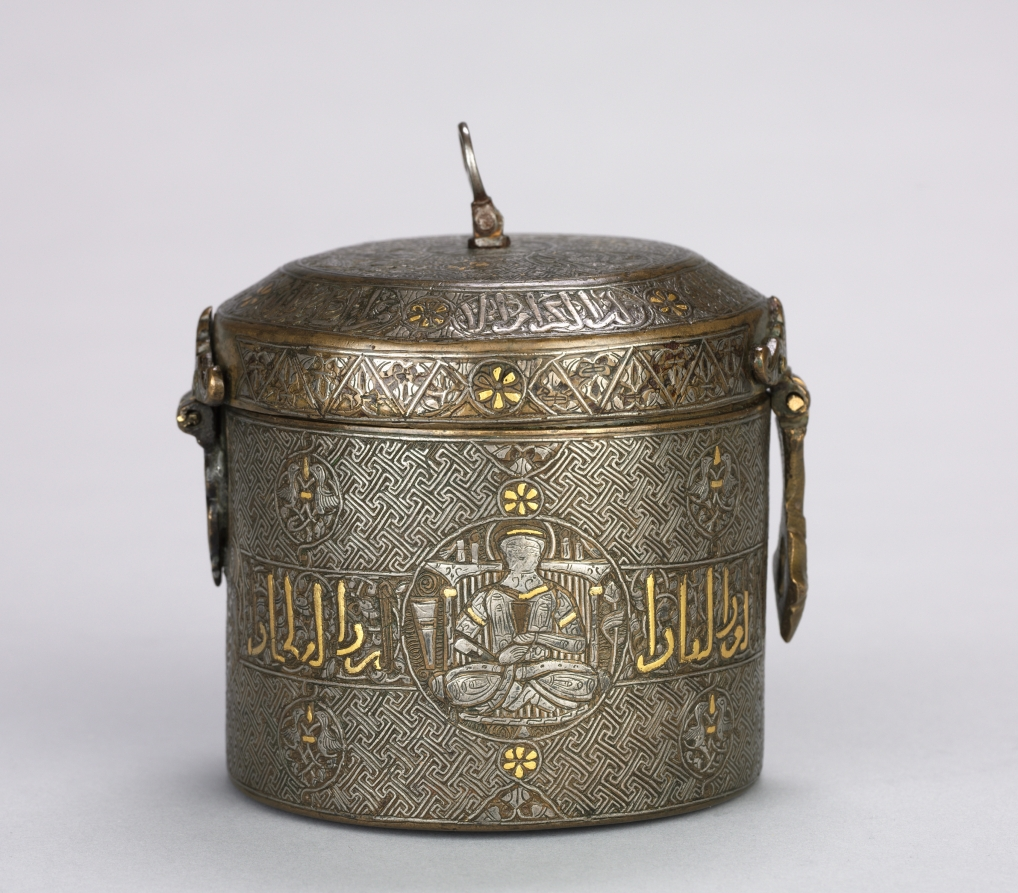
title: Luxury Inlaid Container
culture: Northern Iraq, Ayyubid period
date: c. 1250–1350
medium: sheet brass, inlaid with silver and gold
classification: Metalwork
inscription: Band around body (naskh): "Lasting glory, and safe life, and increasing prosperity, [and] nobility, [and] effective authority"; band around body (naskh): "Brilliance, and nobility, and patience, and modesty, and glory, and long life, and piety, and patience"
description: Metalwork flourished in the 1200s with production centers in Mosul, Damascus, and eastern Anatolia. Along with this container, the nearby ewer and candlestick are examples of the superb pieces produced at this time. Scenes of court life, including banqueting, music, and enthroned figures, decorate the sides and top of the container. The lid is covered in hexagonal swastikas, an ancient solar motif, which is further enhanced by a large sunburst in the center. The calligraphic inscriptions extend wishes for a long life, prosperity, and patience to the owner.